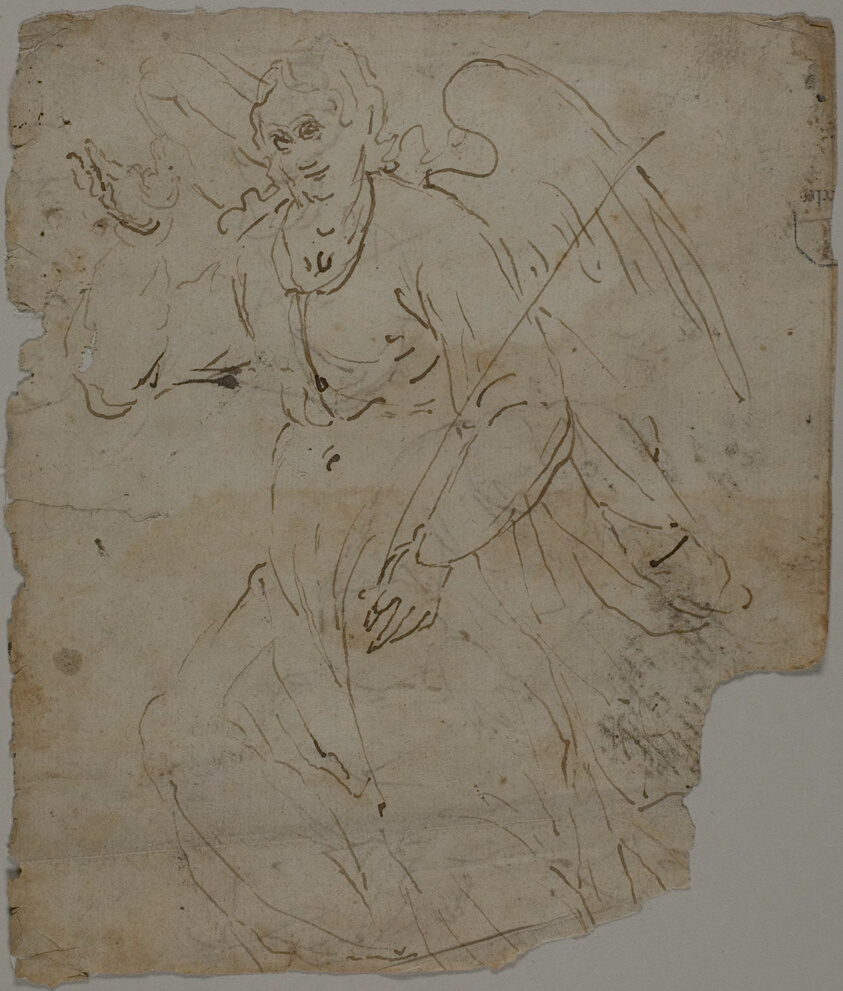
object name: Drawing and Watercolor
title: Annunciate Angel (recto); Sketches of Seated Figure, and Upper Portion and Right Hand of Annunciate Angel (verso)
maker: Genoese (Italian), or Spanish; Late 16th century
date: c. 1600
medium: Pen and brown ink (recto and verso) on ivory laid paper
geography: Genoa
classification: pen and ink drawings; drawings (visual works); prints and drawing